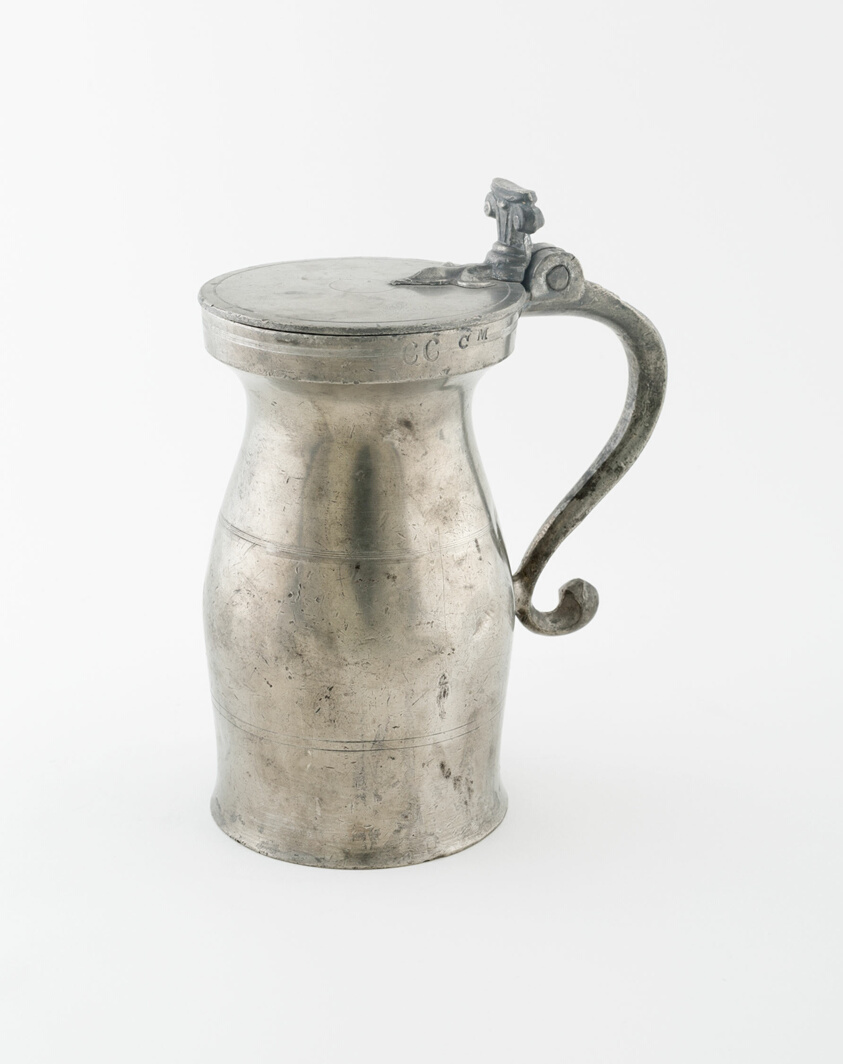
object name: Metalwork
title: Quart Wine Measure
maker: England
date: c. 1780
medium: Pewter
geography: England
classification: pewter; metalwork; european decorative arts